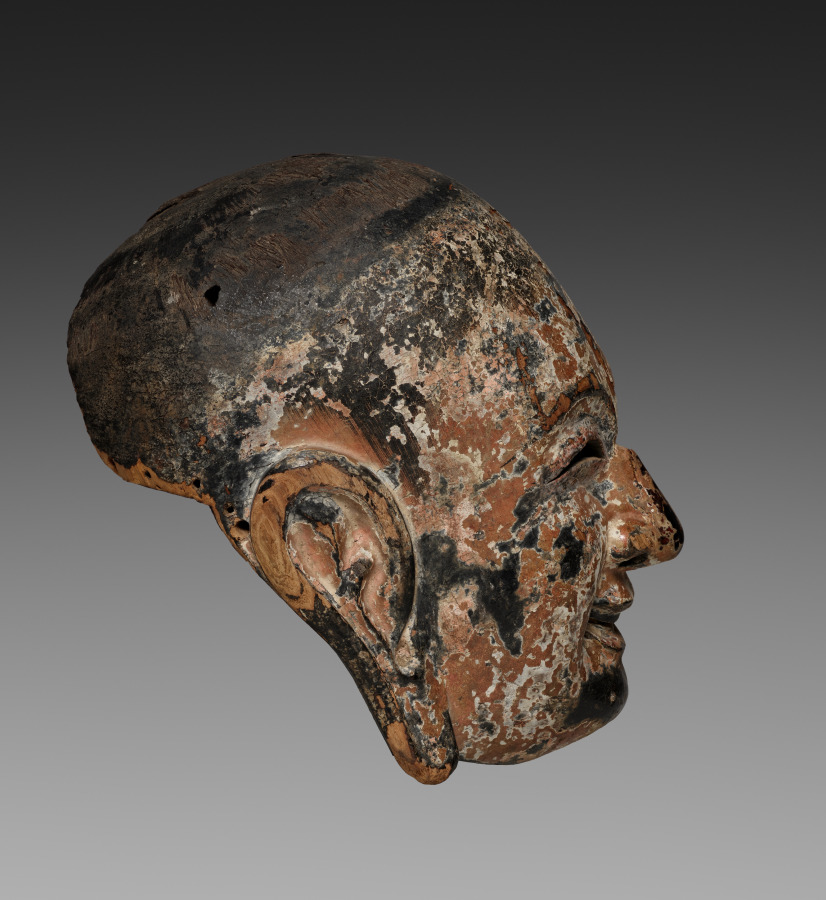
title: Gigaku Mask of Young Persian Boy (Taikōji)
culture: Japan, Nara period (710–94)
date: 710–94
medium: paulownia wood, lacquered and painted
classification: Sculpture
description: This mask is for the role of the son of an old Persian widower in gigaku, a theatrical dance repertoire imported to Japan from continental Asia during the seventh century. The old man and his sons mime prayers to the Buddha. While the mask would cover the entire head of the actor, there are openings for the eyes, nostrils, and mouth.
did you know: This is the mask for one of two sons who accompany a widower in ancient dance theater.